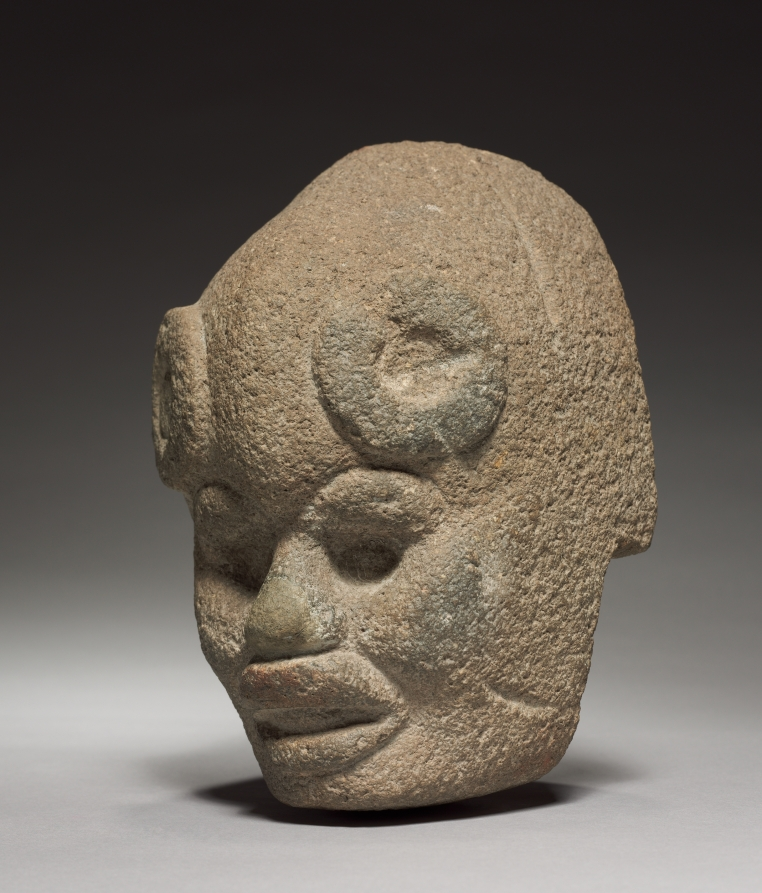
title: Head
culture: Mexico, Classic Veracruz (Totonac or Tajin)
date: 600–1100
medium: stone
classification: Sculpture